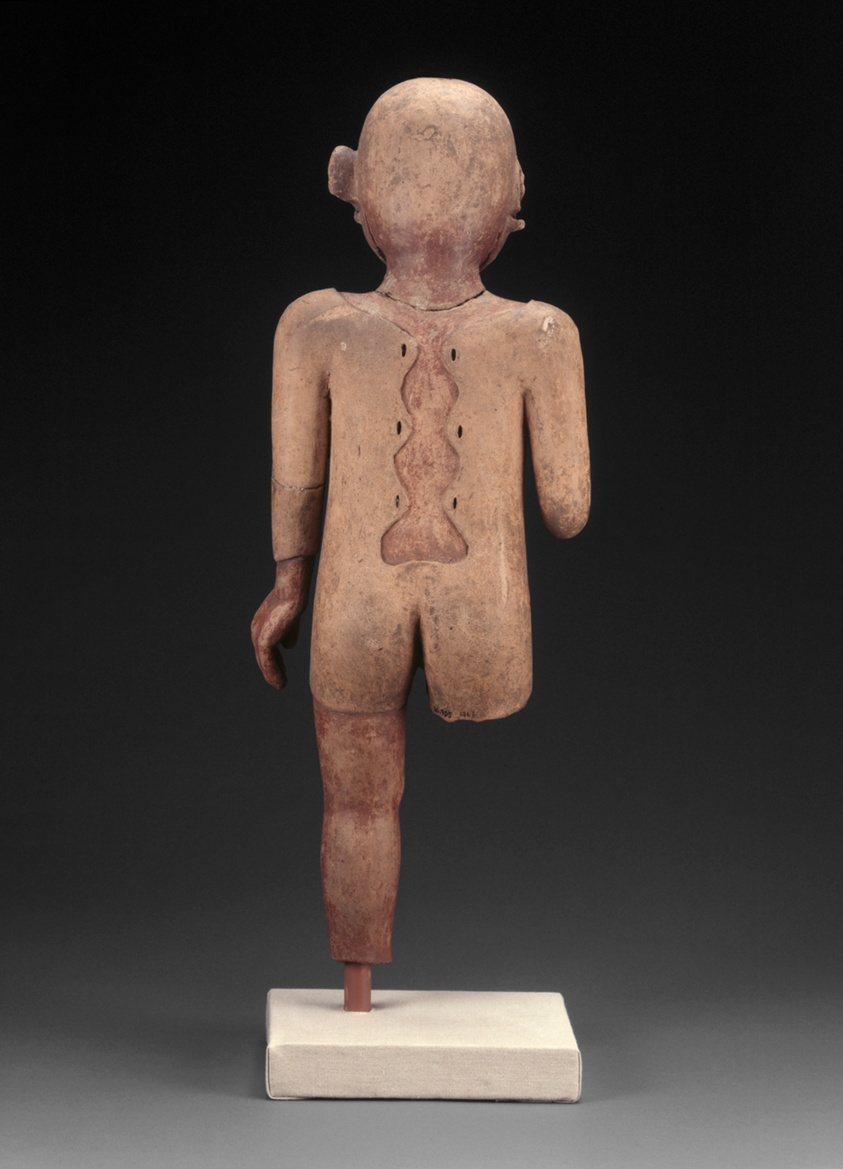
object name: Sculpture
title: Ritual Impersonator of the Deity Xipe Totec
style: aztec, mesoamerican, Pre-Columbian, americas, Arts of the Americas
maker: Aztec (Mexica) (Possibly central Veracruz, Mexico)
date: 1450–1500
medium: Ceramic and pigment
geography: Veracruz state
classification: sculpture; art of the americas; ceramics; statue; ritual objects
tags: sacrifice, ritual sacrifices, agriculture, rituals, mythology, masks